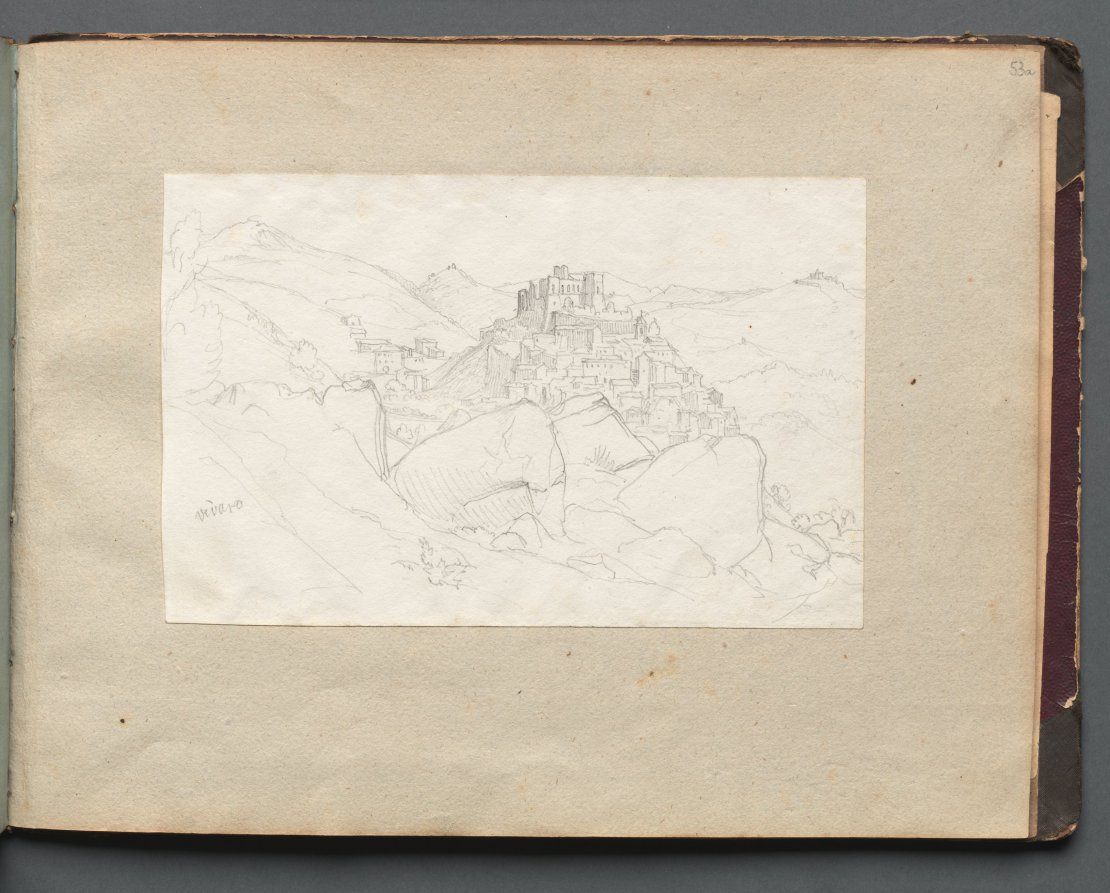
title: Album with Views of Rome and Surroundings, Landscape Studies, page 53a: "Vivaro"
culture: Germany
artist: Franz Johann Heinrich Nadorp (German, 1794–1876)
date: c. 1830s-70s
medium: graphite on white paper laid down on tan paper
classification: Bound Volume